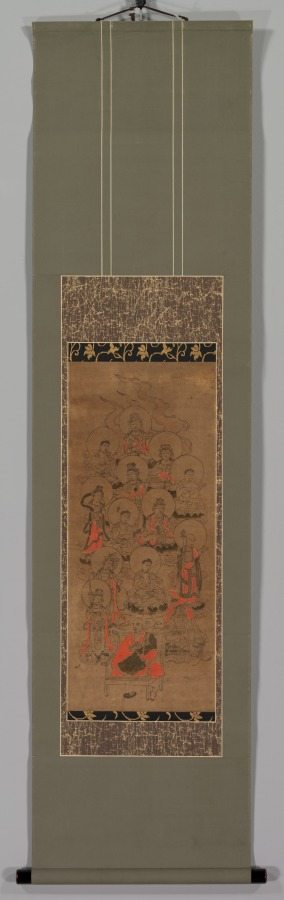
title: Twelve Buddhas and Kobo Daishi (Jusanbutsu)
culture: Japan, Edo period (1615–1868)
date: late 1600s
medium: stencil print (Kappa-zuri); ink and color on paper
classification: Print